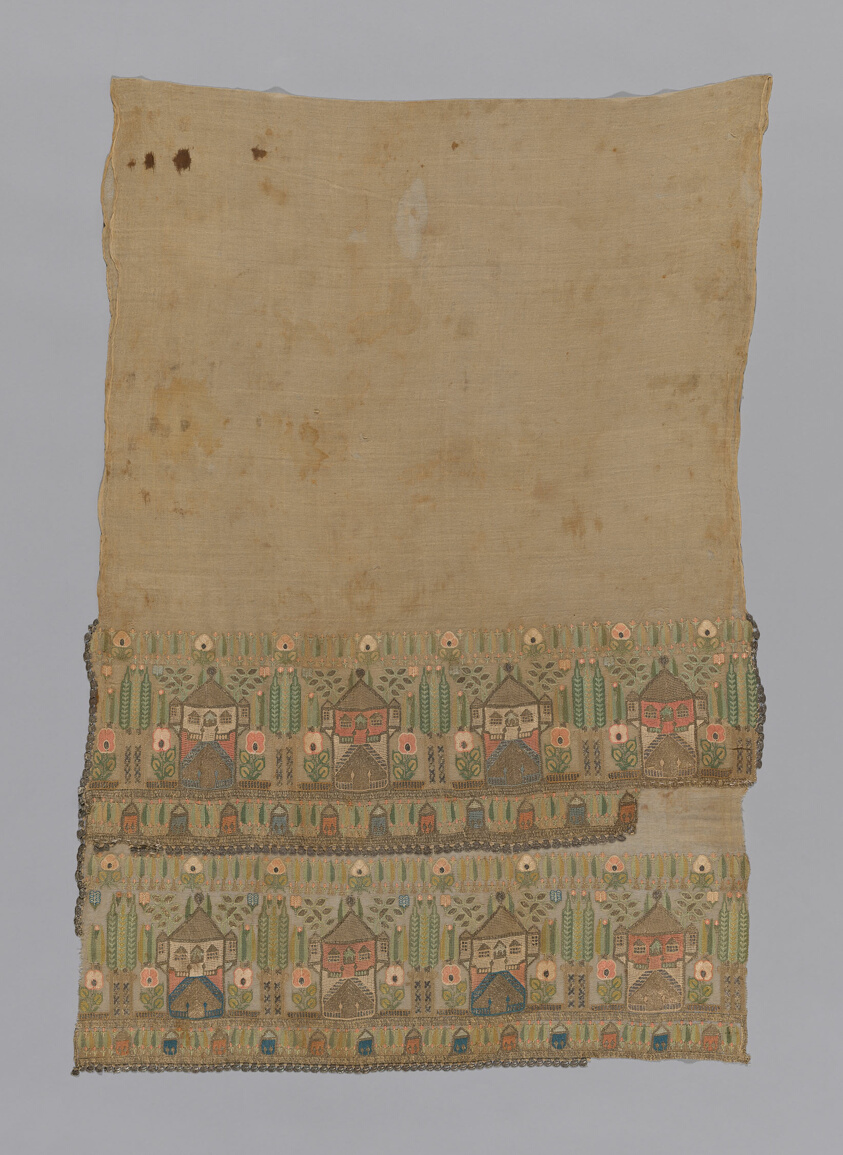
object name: Textile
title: Towel or Napkin (Altered)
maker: Turkey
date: 18th/19th century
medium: Embroidered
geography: Turkey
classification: textile; needlework (visual works); weaving